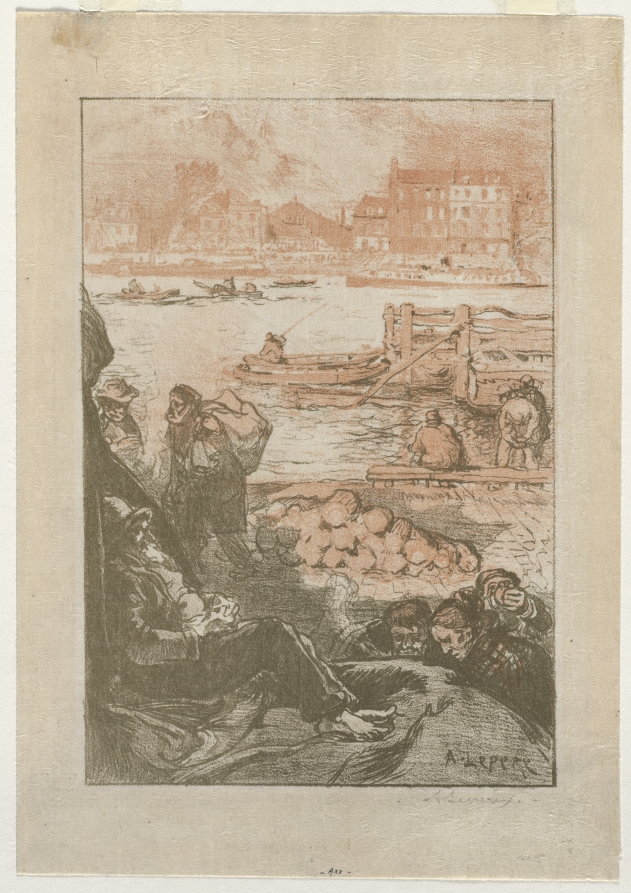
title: [Peasants by a Dock, Paris]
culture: France, 19th century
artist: Auguste Louis Lepère (French, 1849–1918)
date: c. 1870–1918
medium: color lithograph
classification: Print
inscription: signed in pencil, lower right margin: A. Lepere